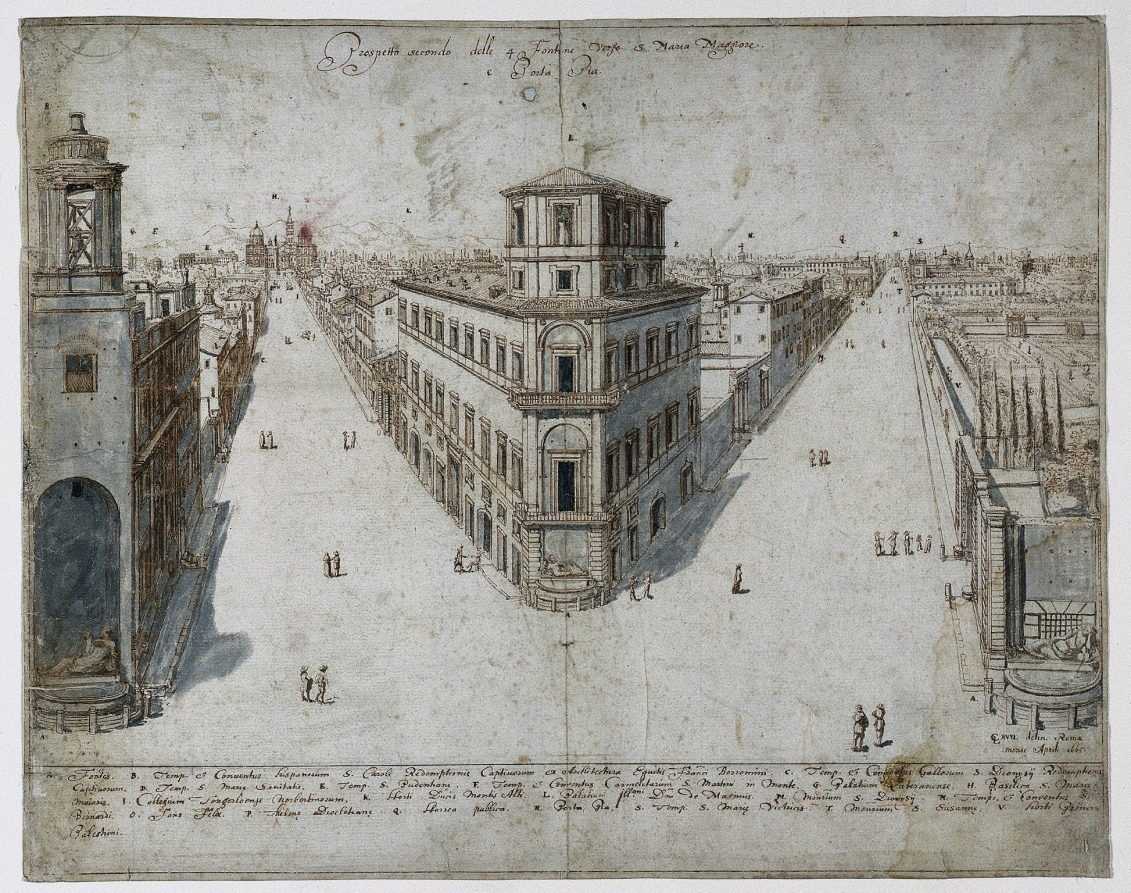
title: Eighteen Views of Rome: The Quattro Fontane Looking Toward Santa Maria Maggiore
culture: Flanders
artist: Lievin Cruyl (Flemish, c. 1640-c. 1720)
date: 1665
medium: pen and brown ink and brush and gray wash over graphite; framing lines in brown ink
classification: Drawing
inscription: signed, lower right, in brown ink: [artist's monogram: LC] RVYL delin: Romæ / mense Aprili 1665. ; by artist, upper center, in brown ink: Prospetto secondo delle 4. Font[a]ne Verso S. Maria Maggiore. / e Porta Pia. ; by artist, throughout composition, in brown ink: [the letters A-V] ; by artist, across bottom, in brown ink: A. Fontes. B. Temp. et Conventus hispaniorúm S. Caroli Redemptionis Captivorum ex Architectura Equitis Frañci Borromini. C. Temp. et Conventus Gallorum S. Dionysij Redemptionis / Captivorum. D. Temp. S. Mariæ Sanitatis. E. Temp. S. Pudentianæ. F. Temp. et Conventus Carmelitarúm S. Martini in Monte. G. Palatium Lateranense. H. Basilica S. Mariæ / Maioris. I. Collegium Tongerloense Norbertinorum. K. Horti Ducis Montis Alti. L. Palatium Illmi.[mi superscript, period beneath m] Dñi de Maximis. M. Moñrium[abbreviation mark in red chalk] S. Dionysij[underlined in red chalk]. N. Temp. et Conventus S. / Bernardi. O. Fons Felix. P. Thermæ Diocletianæ. Q. Horrea publica. R. Porta Pia. S. Temp. S. Mariæ Victricis. T. Moñrium S. Súsannæ. V. Horti Princi [= ?] / Palestrini. ; VERSO, upper left, in brown ink: [illegible] [partially masked] ; ON STRIPS OF PAPER MOUNTED TO VERSO, lower right, in graphite: A20984 ; lower right, in graphite: E. 21